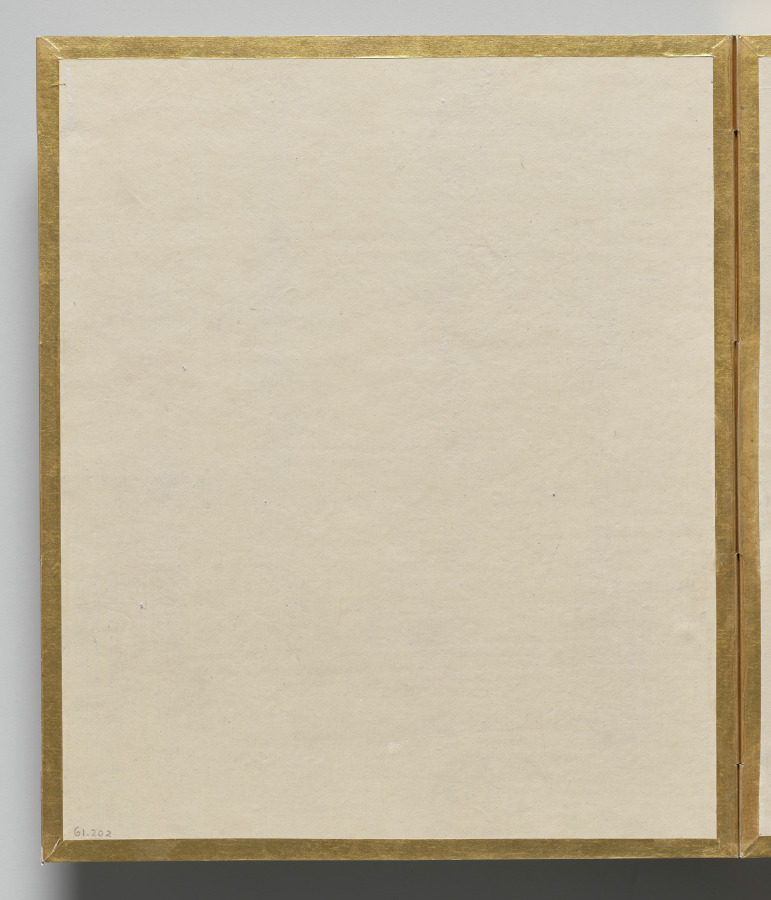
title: Album of Illustrations for the Tale of Genji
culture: Japan, Edo period (1615–1868)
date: 1600s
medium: Double-sided accordion-style album of 17 leaves; ink, light color, and gold on paper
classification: Bound Volume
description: This album contains illustrations for the classic literary work the Tale of Genji, authored in the 1000s by Murasaki Shikibu, an aristocrat of the Heian period (794–1185) court. The scenes are painted in the “white drawing” (hakubyō) mode, in which a fine ink line is used to depict figures and spaces with great subtlety, punctuated only occasionally by traces of red pigment for a character’s lips, a detail of a garment, or a decorative element. These two scenes illustrate episodes from the chapters “Thin Veil of Cloud” (Usugumo) and “Barrier Gate” (Sekiya).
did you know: The illustrations are identified by chapter title in cartouches to the upper right of the paintings.